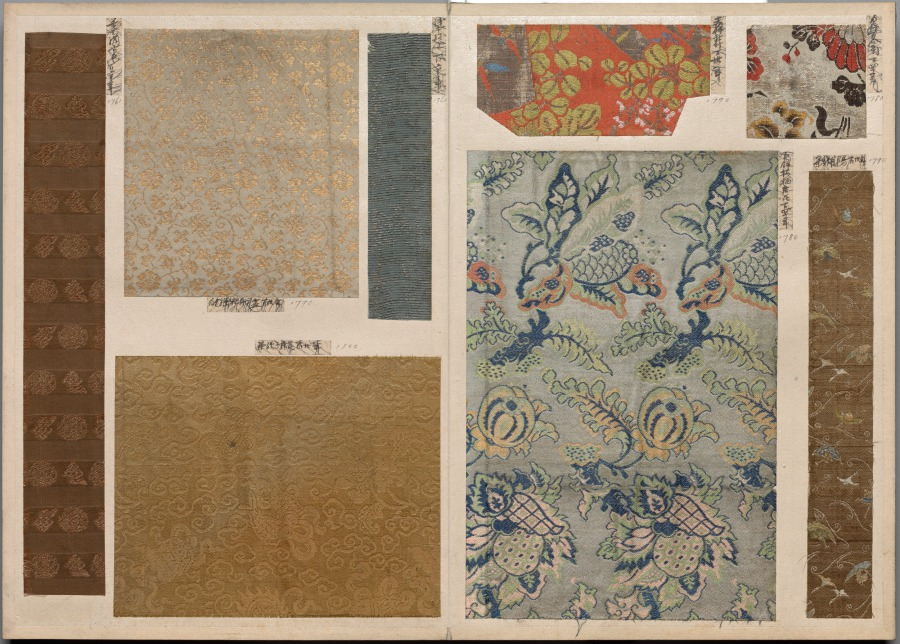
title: Album of Textile Samples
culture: Japan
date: 1790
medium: silk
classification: Textile